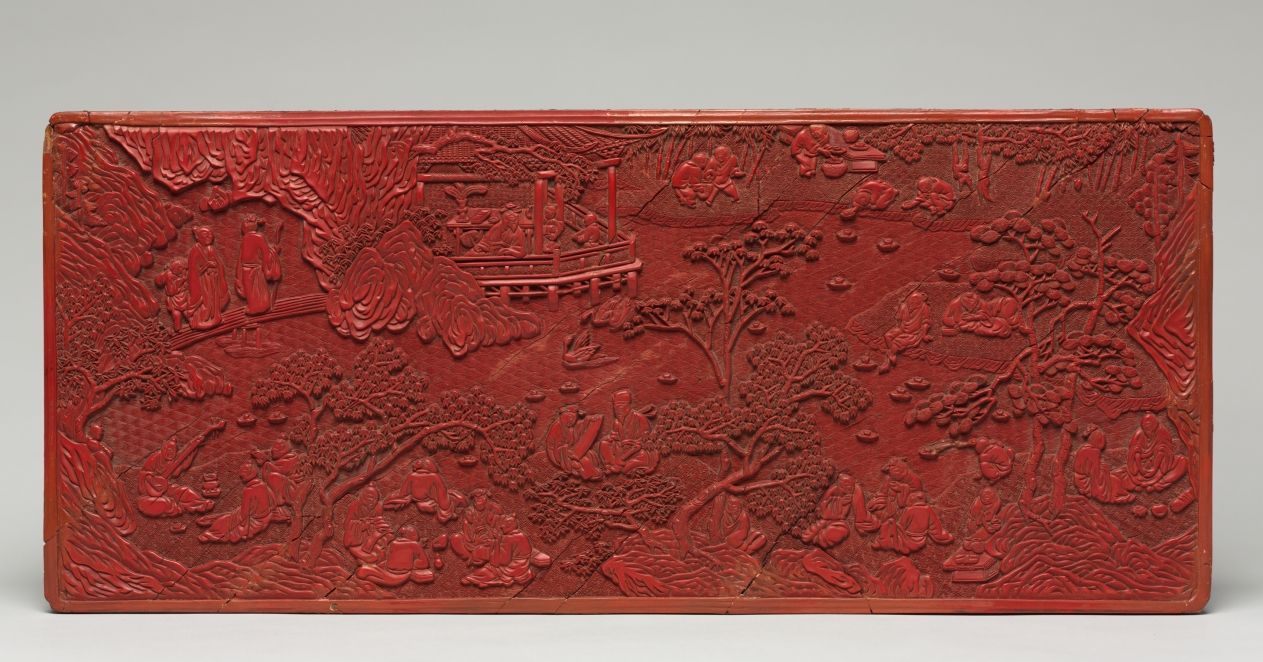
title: Gathering at Lanting (Orchid Pavilion)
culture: China, Ming dynasty (1368–1644)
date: 1400s–1500s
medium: Carved cinnabar-red lacquer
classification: Lacquer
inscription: 大明宣德年製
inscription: F. M. Mayer Christie's 24/5 June '74. 123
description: This lacquer panel, perhaps part of a piece of furniture, depicts the Gathering at Lanting in 353 CE that took place during the Spring Purification Festival, a day spent traditionally outside in nature. Here, cups of wine are set afloat on a winding stream as part of a poetry competition among the attendants. By the Ming dynasty the painting theme Gathering at Lanting also appeared on lacquer, jade, and porcelain. The main figure and central motif, Calligrapher Wang Xizhi Watching Geese, has been moved toward the upper register of the composition.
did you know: A stylized wave pattern represents water; land areas are covered in an overall diamond pattern.